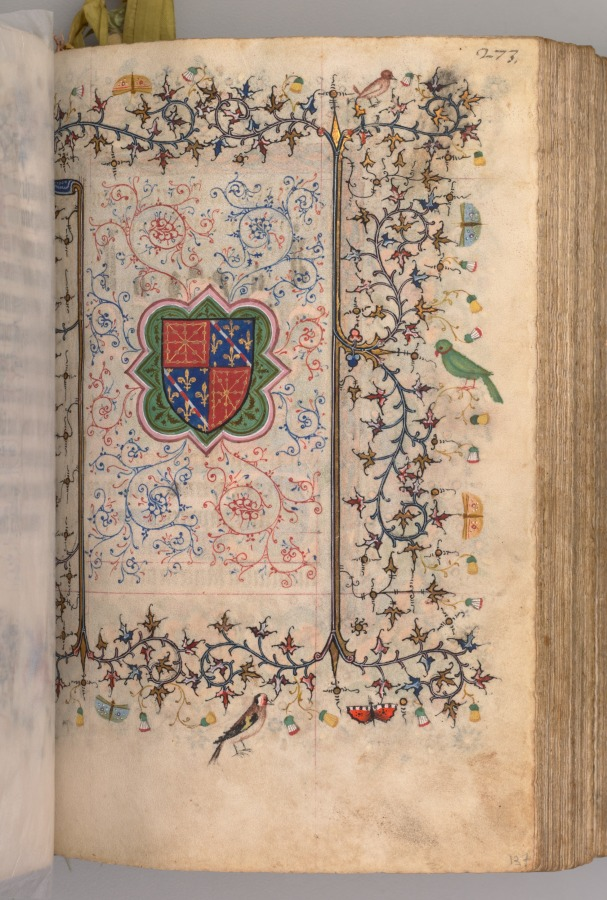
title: Hours of Charles the Noble, King of Navarre (1361-1425): fol. 137r, Coat of Arms of Charles the Noble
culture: France, Paris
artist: Master of the Brussels Initials and Associates (French)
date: c. 1405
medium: ink, tempera, and gold on vellum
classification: Bound Volume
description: This precious volume was obviously highly prized by its owner, the French-born King of Navarre, who had his coat of arms painted on no less than twenty folios. Rather than directly commissioning this manuscript from a specific workshop, it seems that Charles the Noble acquired his book of hours -- perhaps ready-made for the luxury market -- while on a trip to Paris in 1404-05. A collaborative effort, six painting styles are evidenced within the pages of this codex, those of two Italians, two Frenchmen, and two Netherlanders. The painter who was responsible for the planning and decoration of the book, and who produced seventeen of the large miniatures, was a Bolognese artist known as the Master of the Brussels Initials. His principal assistant, responsible for most of the borders, was a Florentine who signed his name "Zecho" da Firenze on folio 208 verso.